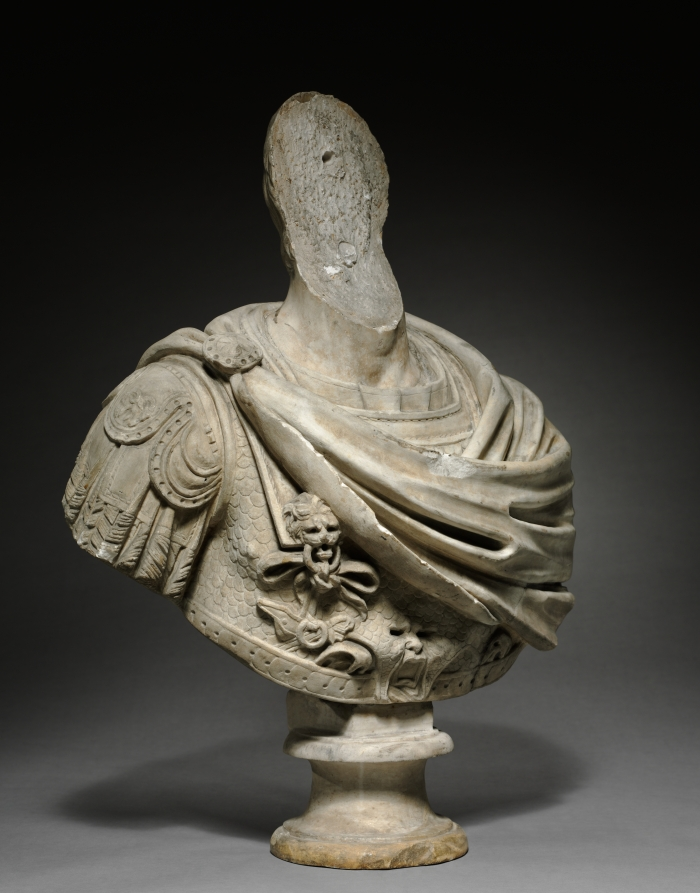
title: Bust of a Man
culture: Italy, Face: Roman, early 2nd century or later; Body: 16th century or later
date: Face: early 2nd century or later. Body: 1500s or later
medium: marble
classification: Sculpture